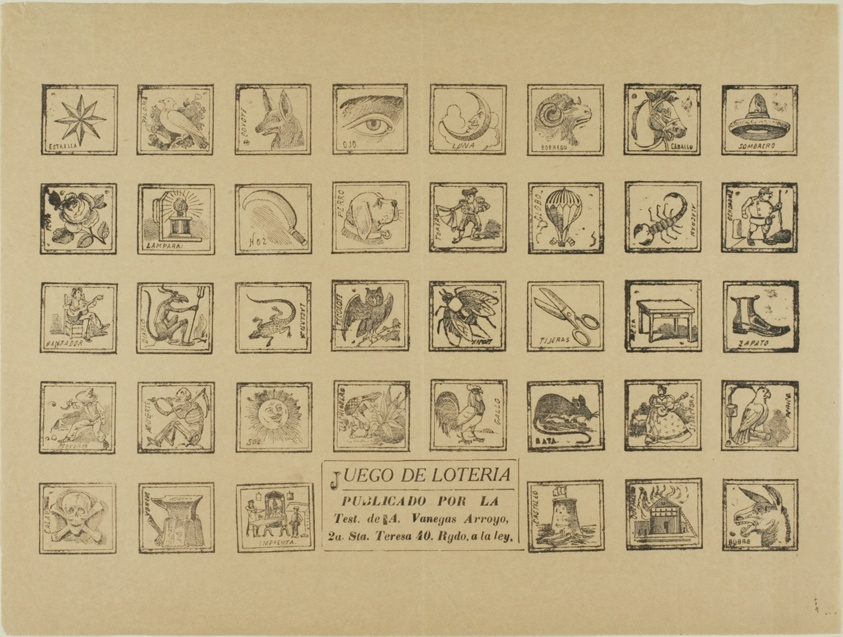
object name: Print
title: Lottery Game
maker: José Guadalupe Posada (Mexican, 1852-1913)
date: 1880–1913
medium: Relief engraving or photo relief etching on tan wove paper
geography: Mexico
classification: lithograph; print; prints and drawing